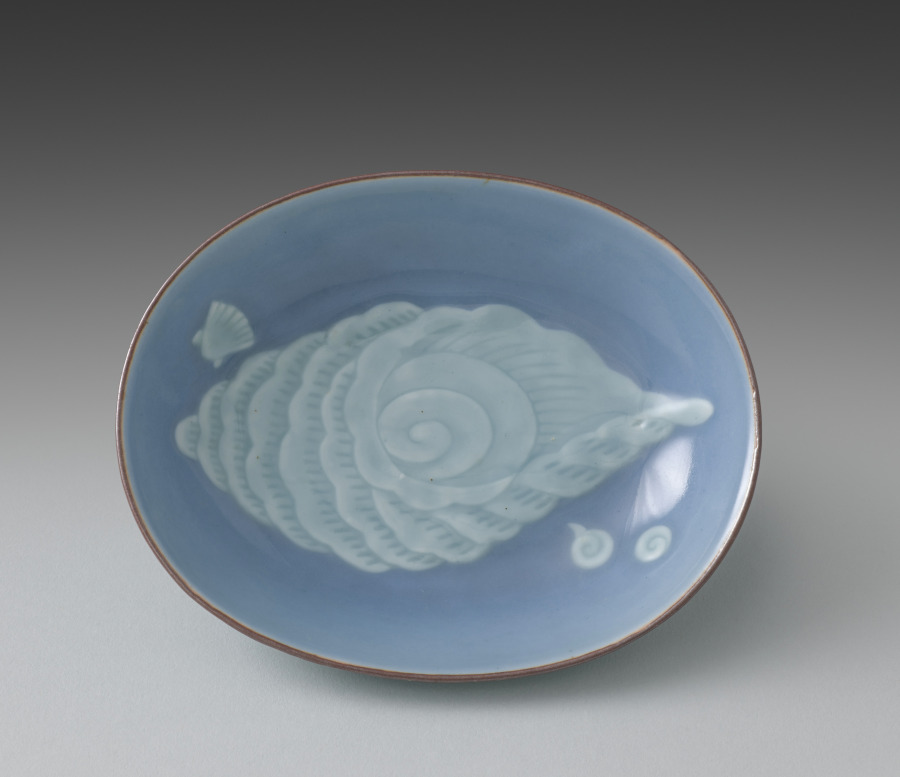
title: Dish from Dishes with Shells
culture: Japan, Meiji period (1868–1912) or Taishō period (1912–26)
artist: Seifū Yohei IV (Japanese, 1872–1951)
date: 1914–46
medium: One from a set of five dishes; porcelain with blue glaze, iron oxide, and molded design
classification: Ceramic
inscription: 清風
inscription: 清風造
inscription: 清風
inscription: 成山清風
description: Yohei IV chose an aquatic theme for this set of five mukōzuke, side dishes. He added an iron oxide rim and used a concentrated blue glaze on both the interior and exterior. The glaze, named on the box lid, is his father’s “evening moon” (tsukiyoi) color. The conch in relief takes up the entire bottom of the dish. Up the sides are two snails on one end and on the other a scallop. This results in a boldly graphic, less realistic effect.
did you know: This set of dishes, mukōzuke, could be used for serving small side dishes at a tea gathering.